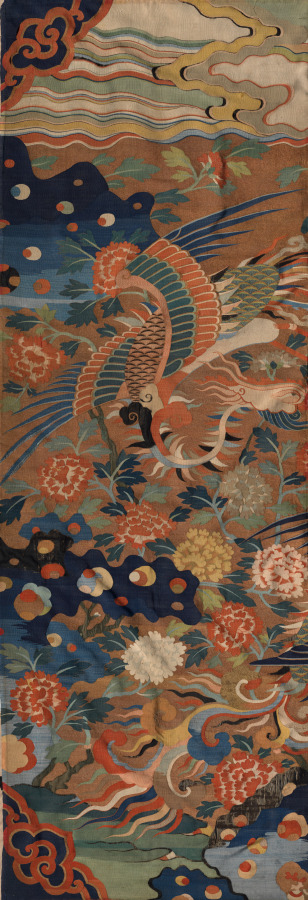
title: Tapestry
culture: China, Ming Period (1368-1644)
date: 1368–1644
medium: tapestry weave, silk and gold thread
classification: Tapestry